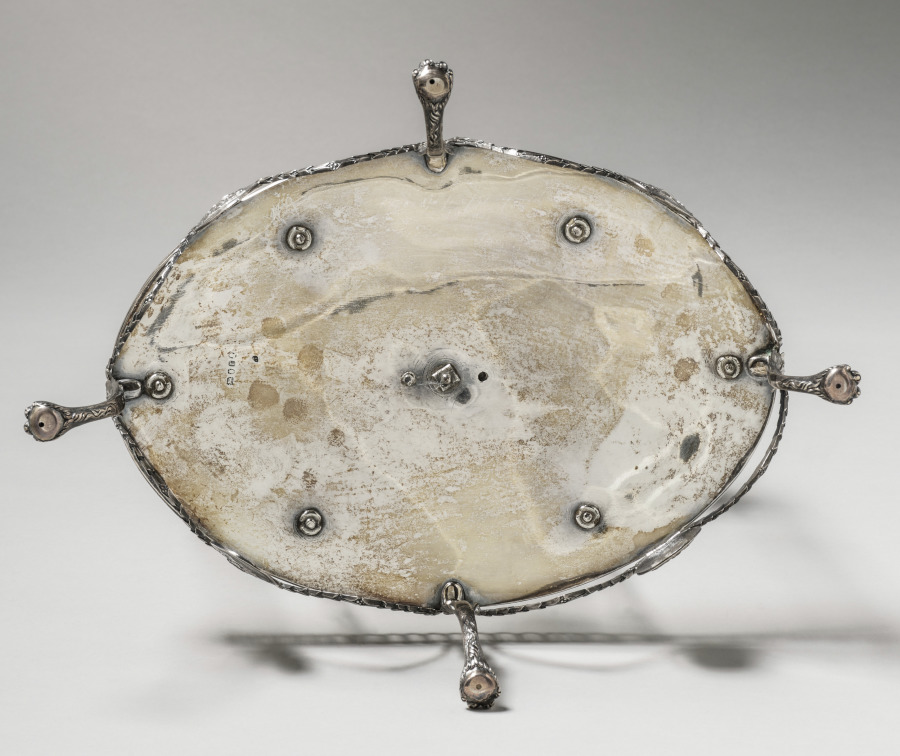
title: Centerpiece (metal stand)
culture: England, 18th century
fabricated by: William Pitts (British)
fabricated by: Joseph Preedy (British)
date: 1792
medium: silver and glass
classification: Silver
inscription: engraved: arms and crest of Bell Coat of arms with Bell impaling Brandling on flat platform.